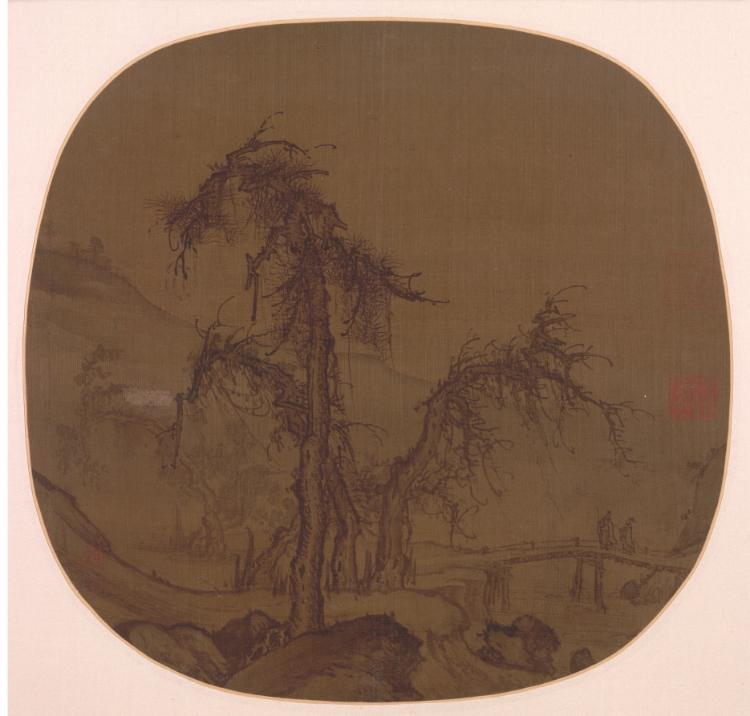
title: Ramblers over a Winding Stream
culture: China, Yuan dynasty (1271-1368)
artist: Luo Zhichuan (Chinese, active 1280s–1320s)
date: before 1330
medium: Album leaf; ink on silk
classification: Painting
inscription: Artist's seal: Zhichuan 稚川 (partially obliterated but readable). 2 additional seals: 1 of Duan Fang 端方 (1861–1911); 1 unidentified.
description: This album leaf is one of few surviving paintings by Luo Zichuan. During the Yuan dynasty, the Luo family of painters in Jiangxi province, in Southern China, had a network of patrons extending their reputation all the way to the capital city of Beijing. The small, rounded figures crossing the bridge on the right are gentlemen enjoying a ramble, rather than ascetics or travelers. The composition is dominated in the center foreground by “crab-claw” trees with knotty trunks and twisting branches. Their robust forms show Luo’s connection to the earlier master, Guo Xi (about 1020–about 1090).